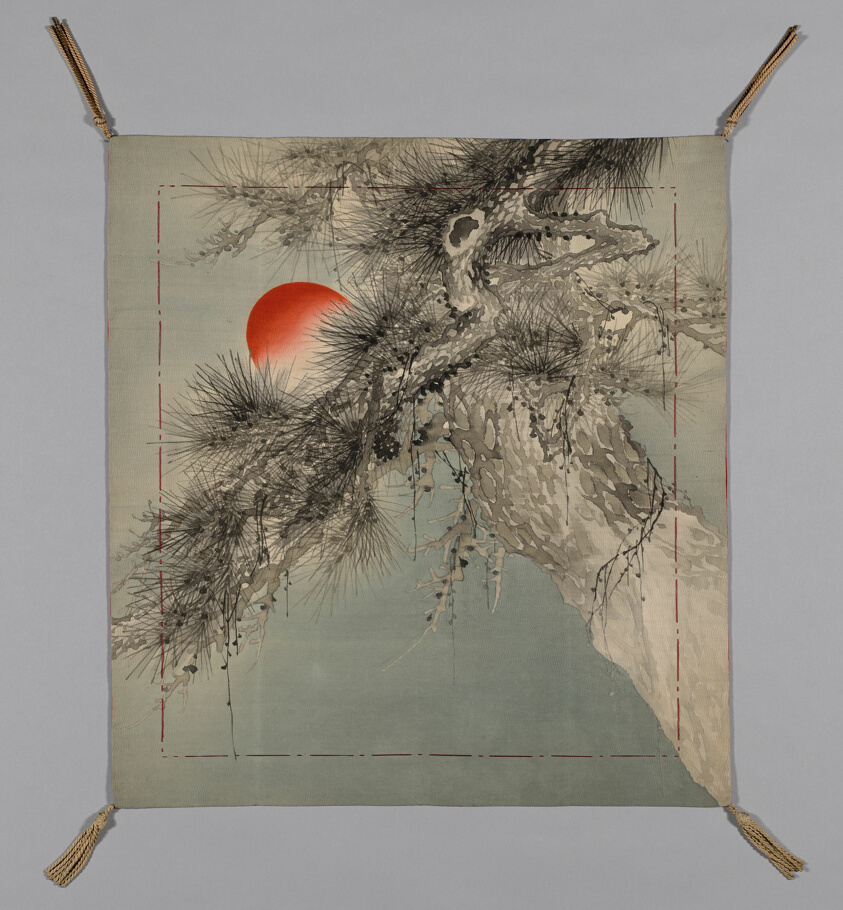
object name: Textile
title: Fukusa (Gift Cover)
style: meiji, Japanism, East Asian, asian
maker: Japan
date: Mid–Meiji period (1868–1912), c. 1895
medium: Patterned side: silk, plain weave; hand painted. Lined with silk, plain weave; possibly dyed with safflower (benibana); sewn with front and lining matched in size (Tachikiri awase); silk, running "controlling" stitches along all edges; corners: silk-wrapped cotton and gold-leaf-over-lacquered-paper-strip wrapped cotton, knotted, replied fringe tassels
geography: Japan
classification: textile; weaving - printed